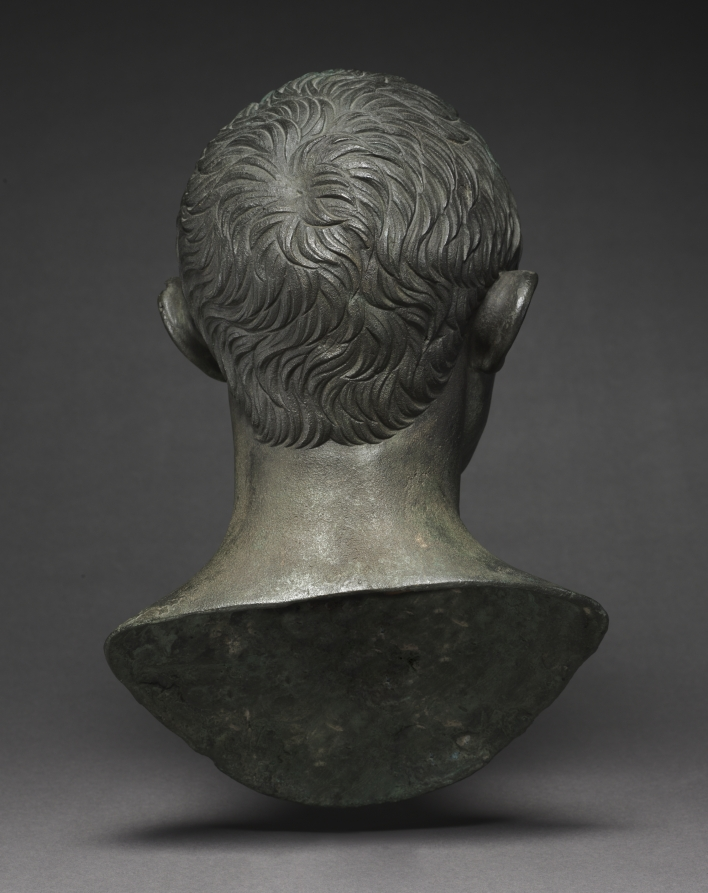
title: Portrait Bust of a Man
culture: Italy, Roman, Augustan period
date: 27 BCE–14 CE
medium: bronze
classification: Sculpture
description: The realistic features of this fine life-sized portrait include wrinkles in the forehead and beside each eye, and very naturalistic ears, protruding but not quite symmetrical. The stylized hair is neatly arranged and suggests a date in the Augustan period, although some scholars have seen it as late Republican. Likely once topping a shaft as a herm bust, the portrait’s subject—now unknown—would have been identified by an inscription.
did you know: This portrait originally had inlaid eyes, probably in stone, glass, or ivory.